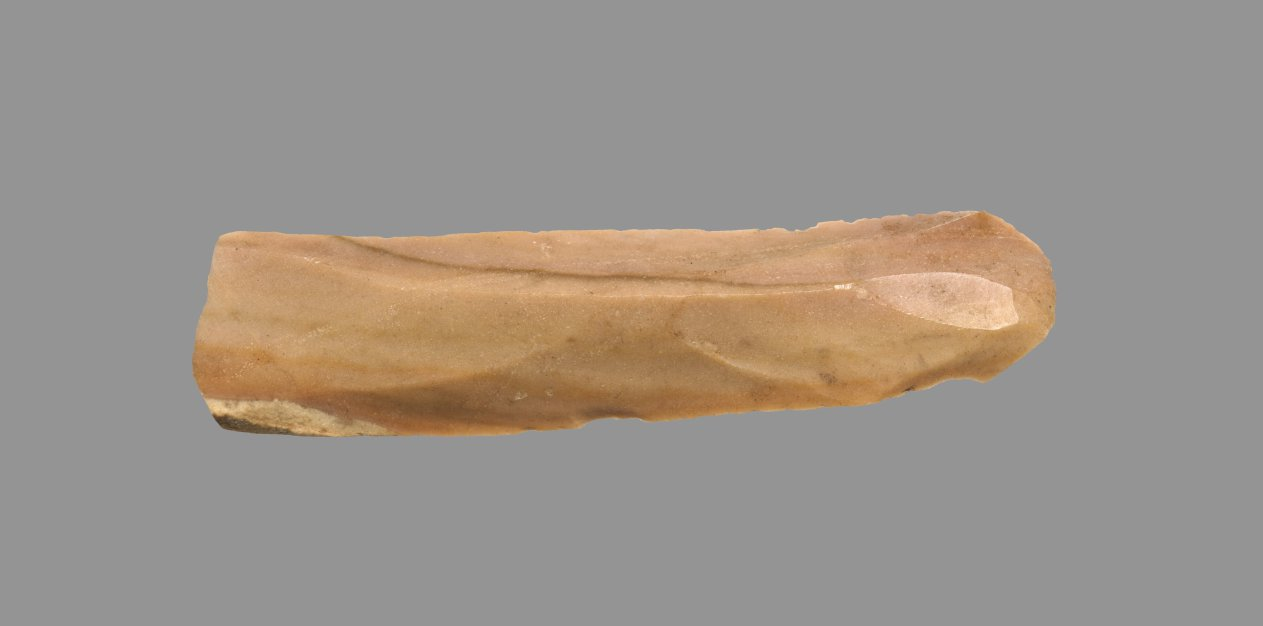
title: Sickle Blade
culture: Egypt, Middle Kingdom (2040–1648 BCE), Dynasty 12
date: 1980–1801 BCE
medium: flint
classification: Implements